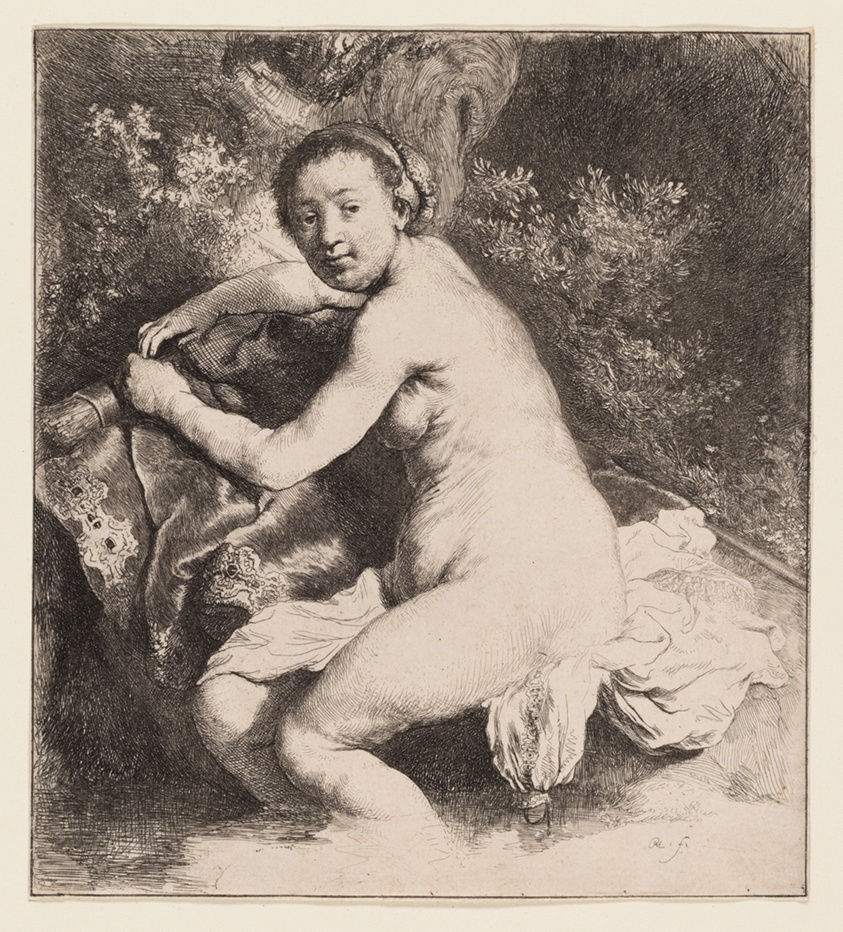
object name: Print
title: Diana at the Bath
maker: Rembrandt van Rijn (Dutch, 1606-1669)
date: c. 1631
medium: Etching on off-white laid paper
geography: Holland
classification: etching; print; prints and drawing; paper